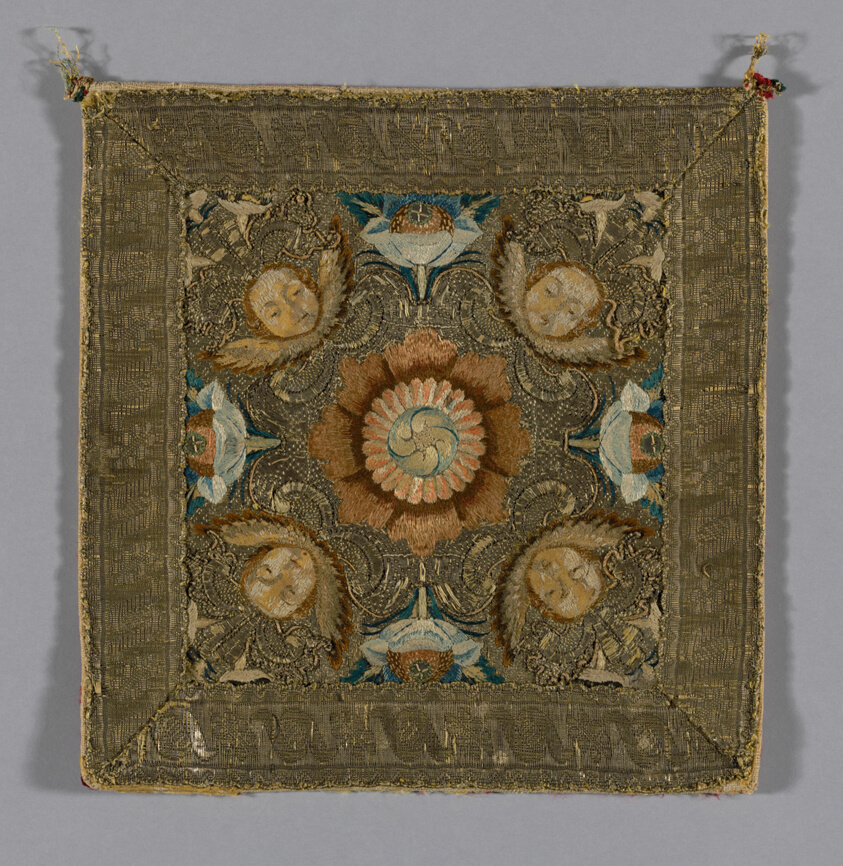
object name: Textile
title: Chalice Cover or Portion of a Burse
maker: Italy or Spain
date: 1675/1725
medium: Silk, plain weave; embroidered in silk floss and gilt strips wound around a silk fibre core in satin stitches, French knots; attached metal pailllettes; lining: silk, plain weave; backing: linen, plain weave; paper cor e in braid; bound edges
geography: Italy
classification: textile; needlework (visual works); liturgical